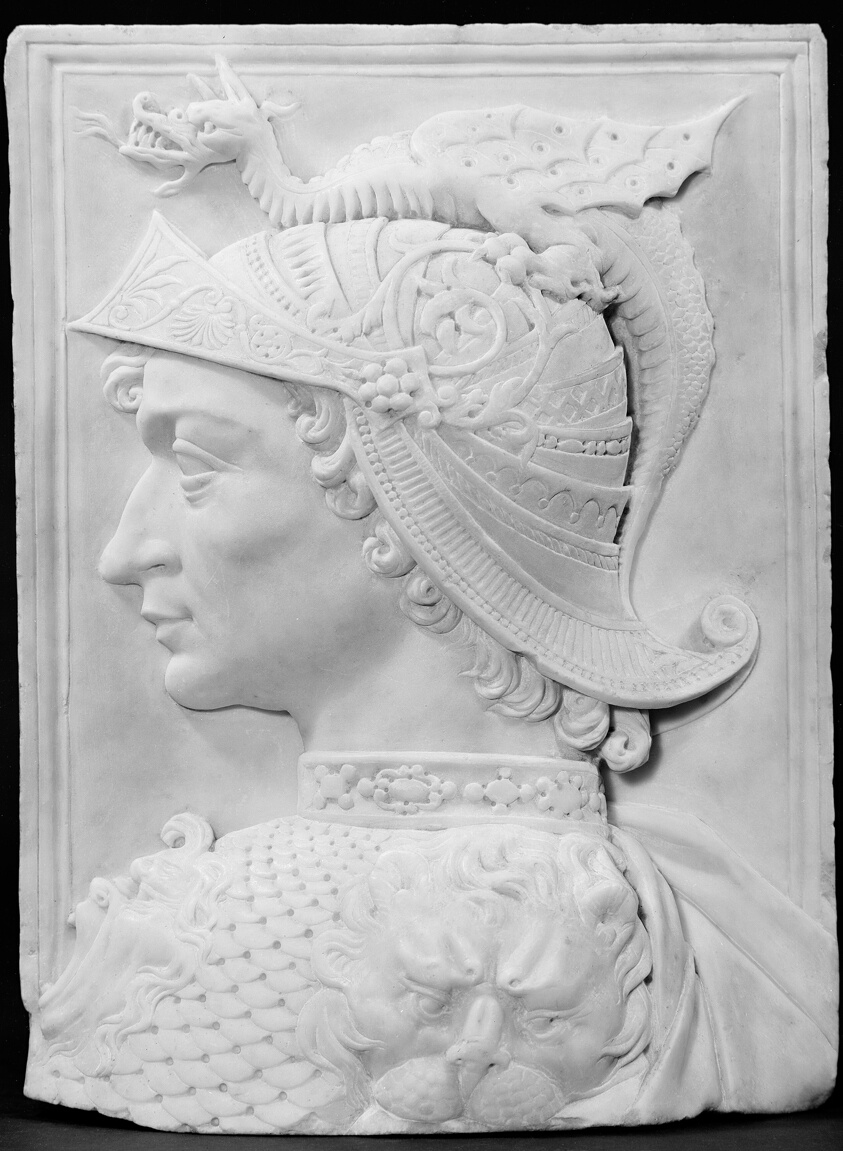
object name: Sculpture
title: Portrait of a Warrior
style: nineteenth century, 19th century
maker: Artist unknown (Italian, active 19th century)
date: 19th century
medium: Marble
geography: Italy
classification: relief; sculpture; Italian; marble; sculpture/stone; stone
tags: warriors, animals, lions, face paint, busts, profile, armor, dragon, helmets, soldiers